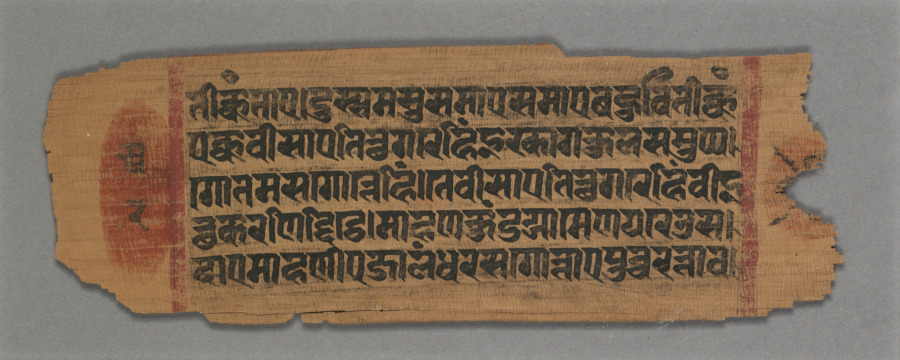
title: Folio 2 (verso), from a Kalpa-sutra and Story of Kalakacharya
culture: Western India, Gujarat, 13th century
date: 1287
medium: gum tempera and ink on palm leaf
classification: Painting